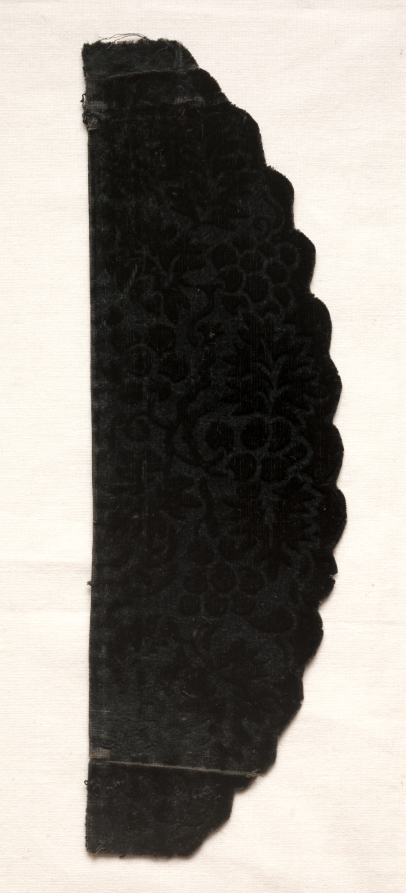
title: Velvet Cuffs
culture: France, 19th century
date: 1800s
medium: velvet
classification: Velvet